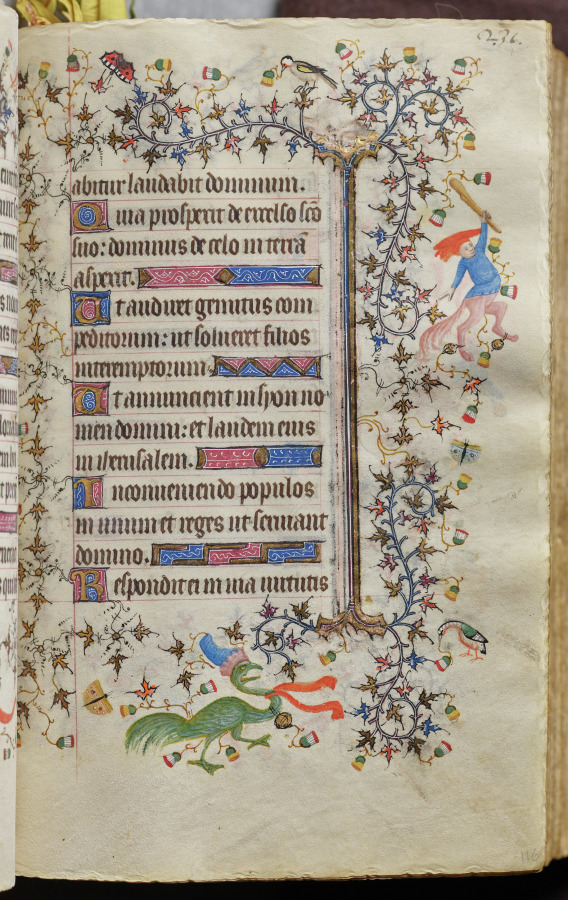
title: Hours of Charles the Noble, King of Navarre (1361-1425): fol. 116r, Text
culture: France, Paris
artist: Master of the Brussels Initials and Associates (French)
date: c. 1405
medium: ink, tempera, and gold on vellum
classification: Bound Volume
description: This precious volume was obviously highly prized by its owner, the French-born King of Navarre, who had his coat of arms painted on no less than twenty folios. Rather than directly commissioning this manuscript from a specific workshop, it seems that Charles the Noble acquired his book of hours -- perhaps ready-made for the luxury market -- while on a trip to Paris in 1404-05. A collaborative effort, six painting styles are evidenced within the pages of this codex, those of two Italians, two Frenchmen, and two Netherlanders. The painter who was responsible for the planning and decoration of the book, and who produced seventeen of the large miniatures, was a Bolognese artist known as the Master of the Brussels Initials. His principal assistant, responsible for most of the borders, was a Florentine who signed his name "Zecho" da Firenze on folio 208 verso.